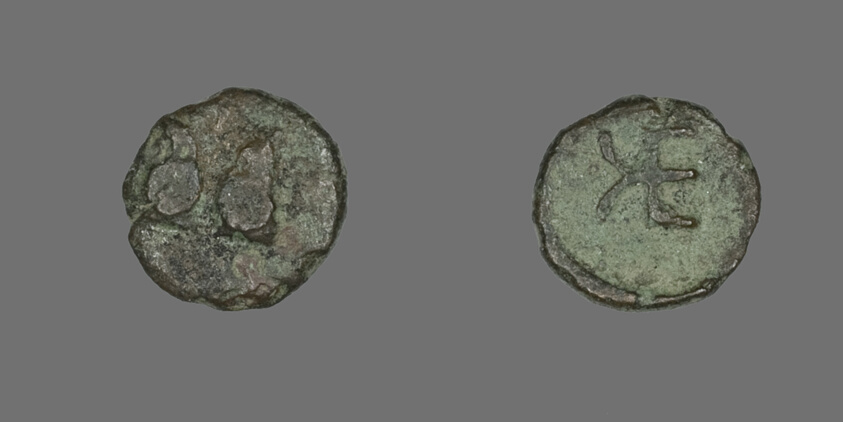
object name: Coin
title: Coin Depicting Two Rams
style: greek, ancient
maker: Greek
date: about 400-310 BCE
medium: Bronze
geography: Ancient Greece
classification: coin; ancient art